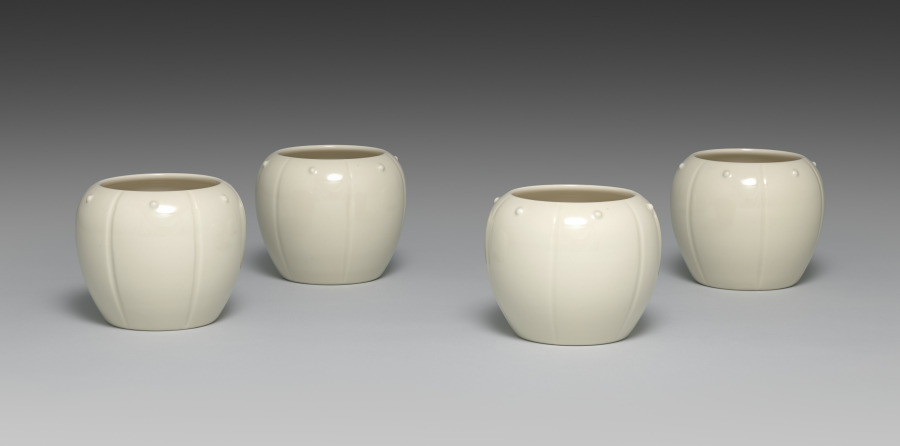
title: Lit Charcoal and Ash Containers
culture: Japan, Meiji period (1868–1912)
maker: Seifū Yohei III (Japanese, 1851–1914)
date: 1893–1914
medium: Set of four containers; porcelain with molded design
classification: Ceramic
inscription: 清風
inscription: The storage box for this set is inscribed and impressed with seals.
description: The box lid for these six-lobed lit charcoal and ash containers, or hiire, identifies them as kōhakuji, another of Yohei III’s translucent cream colors over ivory clay bodies. One might translate the name as “lustrous pearl[–glazed ivory] porcelain.” A hiire was filled with ash with burnt coals at the center so that embers and tobacco ash could be discarded safely during a gathering. Each of the lobes on the containers has a round protrusion set below the rim. The studlike pattern is called ruiza. The term is also used to describe the pattern that rings the shoulder of some flower vases or metal kettles used in chanoyu.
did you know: The Seifu studio generally followed the standard practice in Japan for identifying the artist and object in box inscriptions.